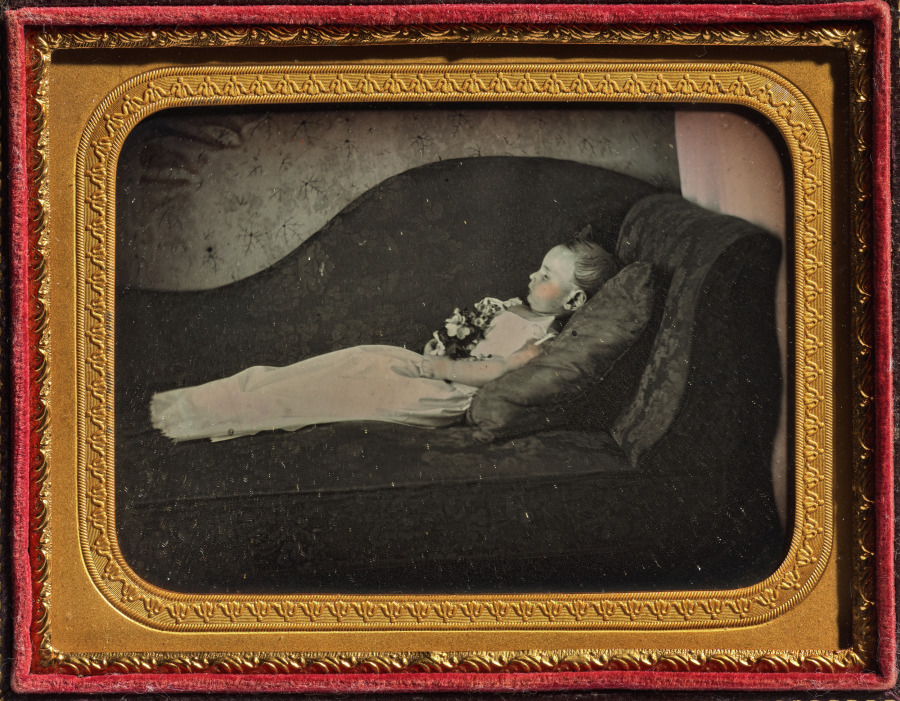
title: Dead Child On a Sofa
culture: America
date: c. 1855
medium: daguerreotype, applied color, quarter-plate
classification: Photograph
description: This carefully staged daguerreotype of a dead child is an outstanding example of a very common subject: the postmortem portrait. Using the stylistic conventions of the day, the unidentified artist successfully created a visually pleasing scene, despite the nature of the image. Dressed in white with a bouquet of flowers on the chest, the child, seen in profile, reclines on an elaborately patterned sofa. Delicate flesh tones were added to the cheek and arm, suggestive of a healthy child sleeping. The high rate of infant mortality throughout the 19th century made this variety of portraiture common, satisfying the emotional need of the parents to have a lasting memory of a loved one.